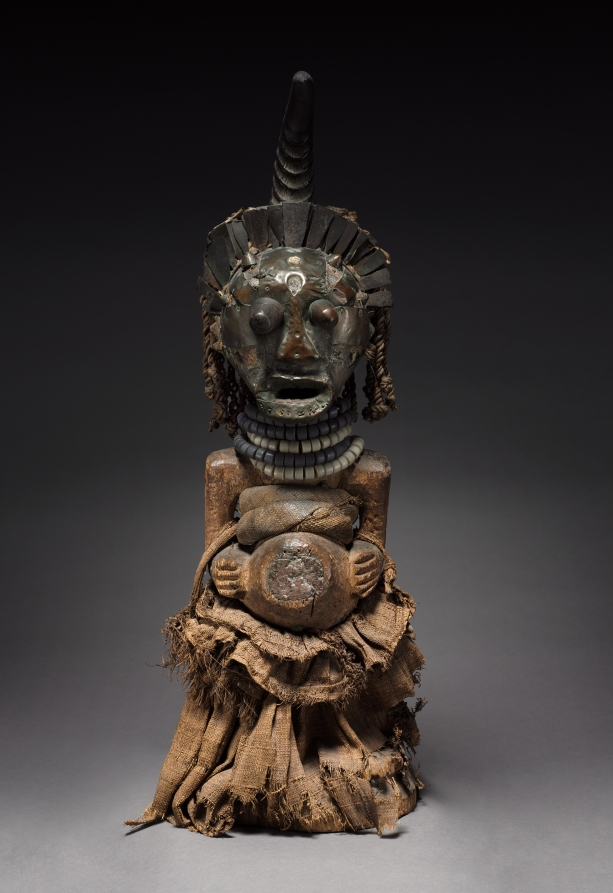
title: Male Figure (nkishi)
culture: Africa, Central Africa, Democratic Republic of Congo, Songye-style carver and nganga (priest)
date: late 1800s–early 1900s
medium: Wood, glass beads, brass (including upholstery studs), copper alloy, iron alloy, raffia, reedbuck antelope horn, rawhide, animal hair, human teeth, organic material, minerals, and plant fibers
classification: Sculpture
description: This figure's visual impact and workmanship suggest that an extended family––rather than an individual––used it. The raffia skirt around the waist and the blue and white beads are indicators of leadership. The metal appliqué covering the face and the metal blades that hedge the headgear refer to the blacksmith, a culture hero celebrated in a Songye myth narrating the formation of the state. The metal strips on the skeletal face are said to relate to lightning, signaling the figure's role as a powerful anti-sorcerer, but the contrast between white iron and red copper symbolically alludes to the ambivalent powers of the figure.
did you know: Researchers conducted X-ray scanning on this figure, revealing its internal structure and human teeth, an antelope horn, and animal hair.